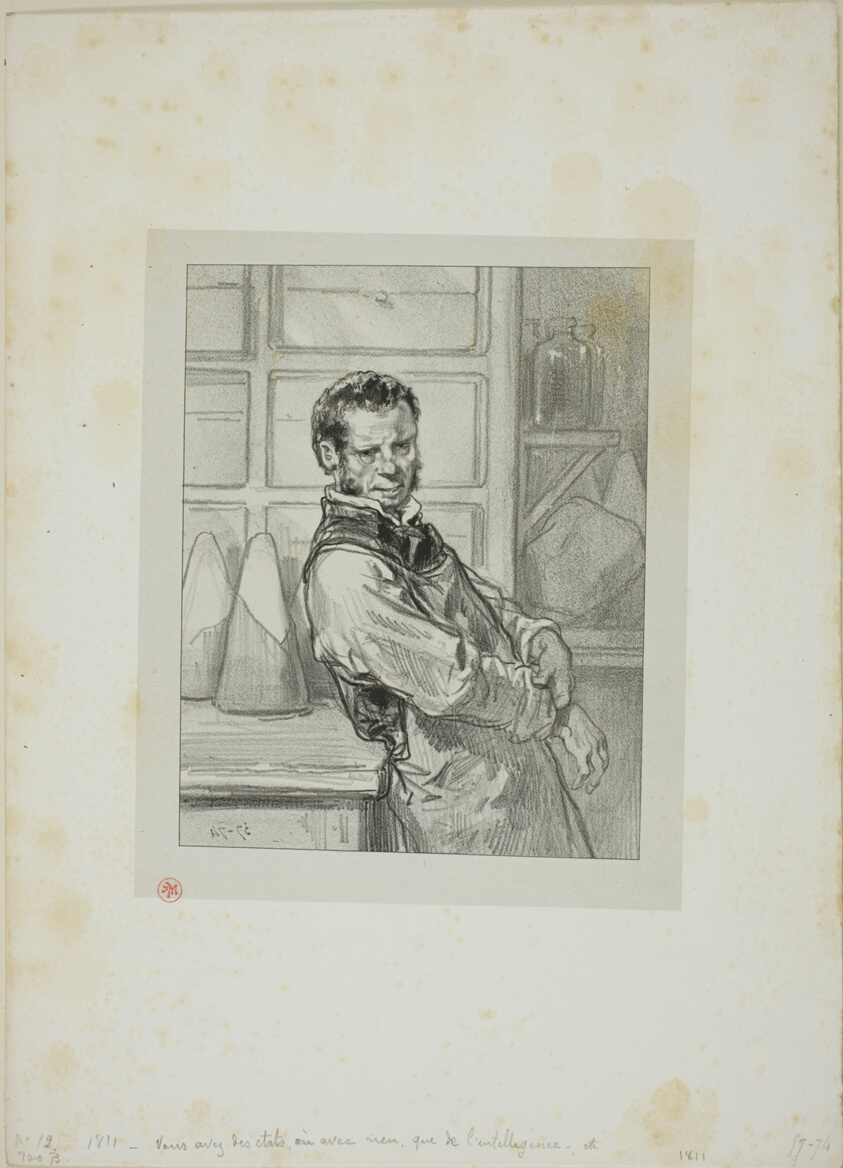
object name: Print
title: Masks and faces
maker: Paul Gavarni (French, 1804-1866)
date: 1857–58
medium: Lithograph in black on light gray China paper, laid down on ivory wove paper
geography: France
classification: lithograph; print; prints and drawing